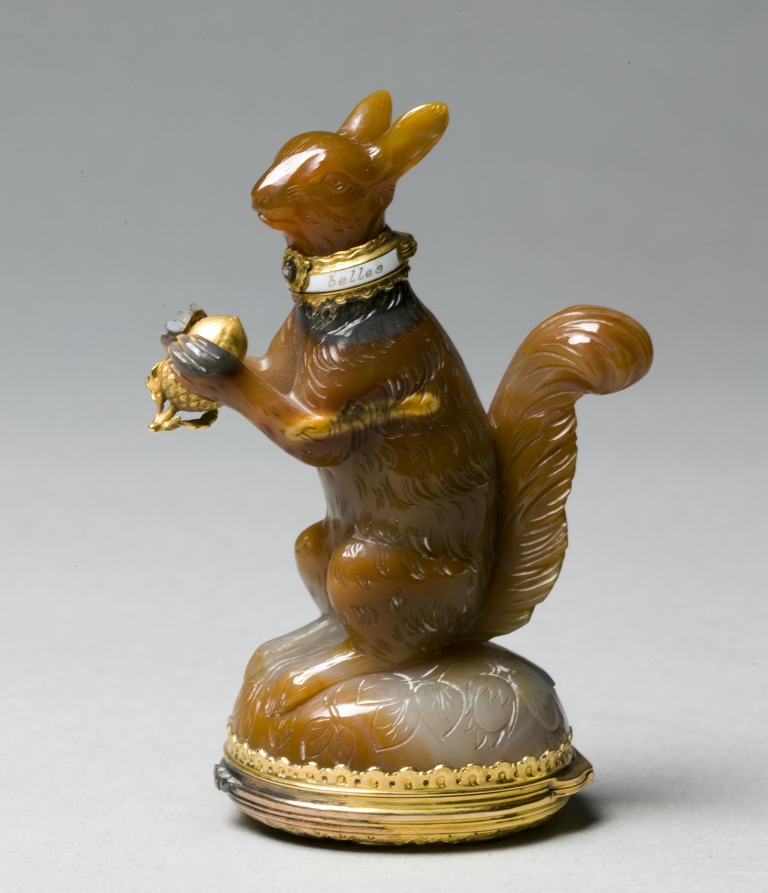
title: Scent Bottle and Snuff Box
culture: England, late 18th century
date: c. 1760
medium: agate, gold diamonds and enamel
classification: Miscellaneous